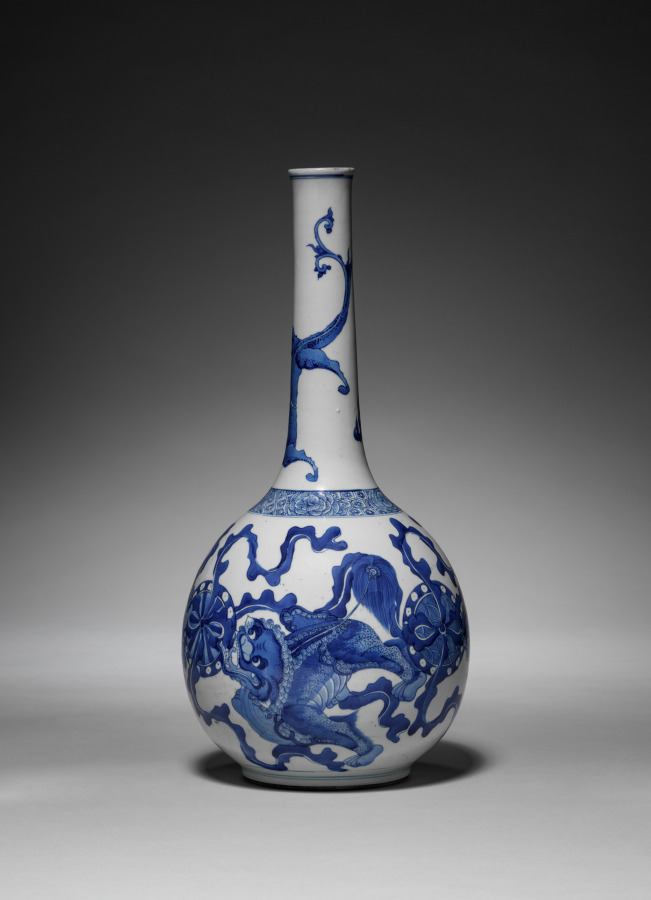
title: Bottle Vase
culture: China, Qing dynasty (1644-1911), Kangxi reign (1661-1722)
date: 1662–1722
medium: porcelain with underglaze blue decoration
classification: Ceramic